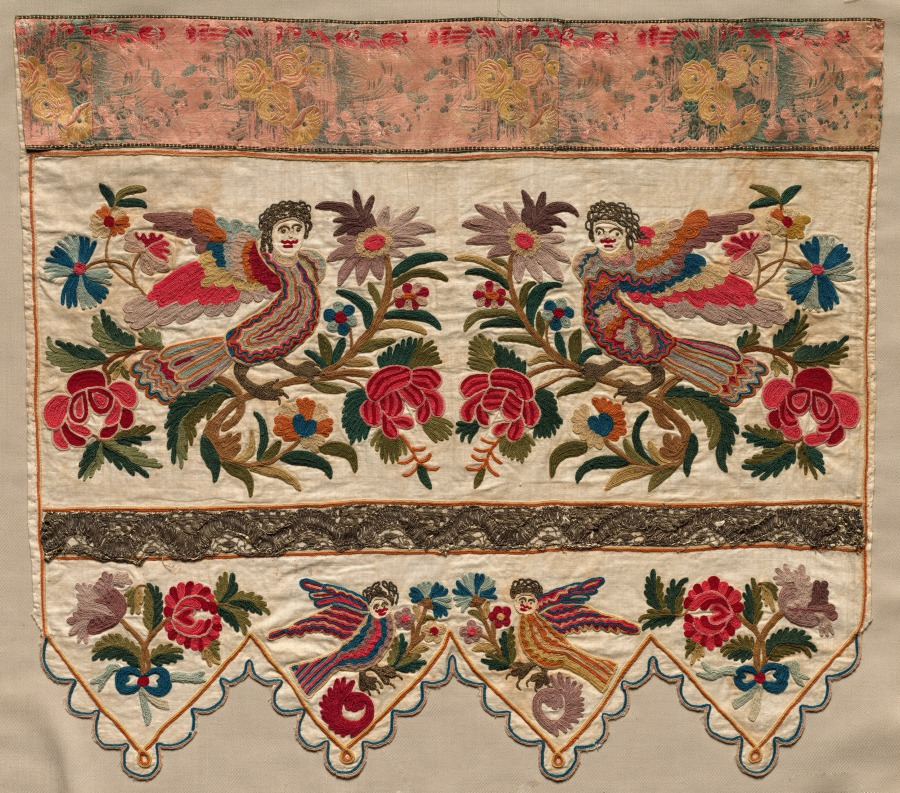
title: Towel End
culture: Russia, Nizhny-Novgorod province, 18th-19th century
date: c 1700s- 1800s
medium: plain weave linen (est.) with polychrome wool (est.) and metal thread chain stitch embroidery; applied silk (est.) ribbon and metal thread trim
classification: Embroidery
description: This Russian embroidered panel was likely used to embellish the end of a bathing towel. Textiles of this type are valuable for their fine embroidery of ancient folk motifs, ritual significance, exemplification of the role of textiles in their society, and in this case, connection to a prominent woman collector, Natalia de Shabelsky, without whom this textile and others like it might have been lost.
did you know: Embroidering the ends of everyday towels was a common folk tradition in many cultures because it displayed the skill of the mother or daughter who stitched them.